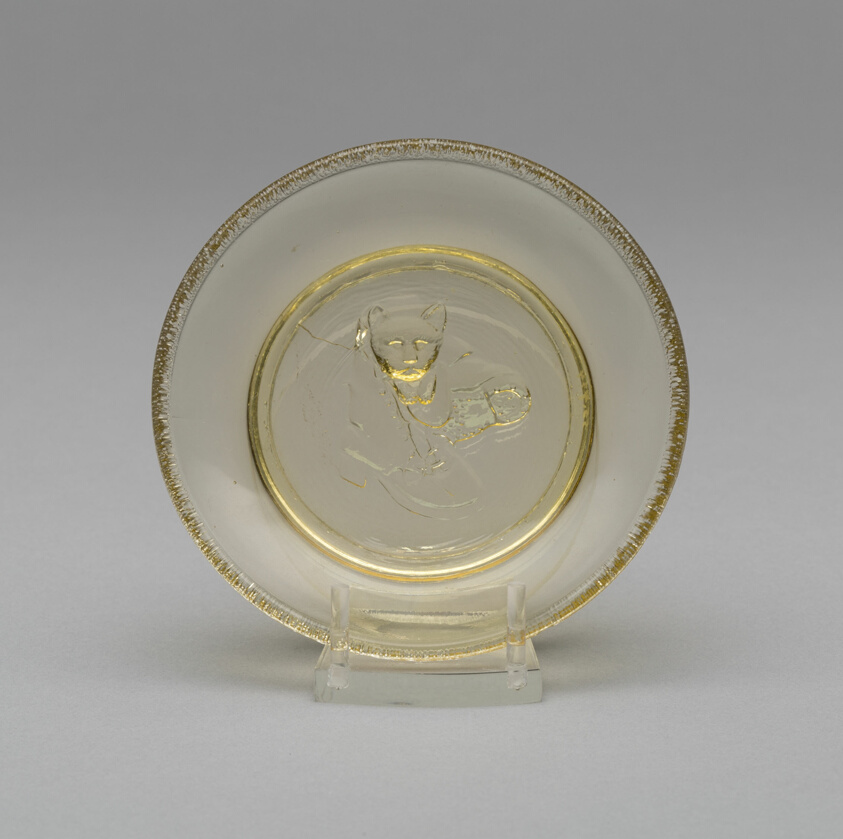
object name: Glass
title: Toy plate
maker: Artist unknown (American, 19th century)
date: c. 1850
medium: Pressed glass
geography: United States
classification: glass; american decorative arts; american arts; decorative arts